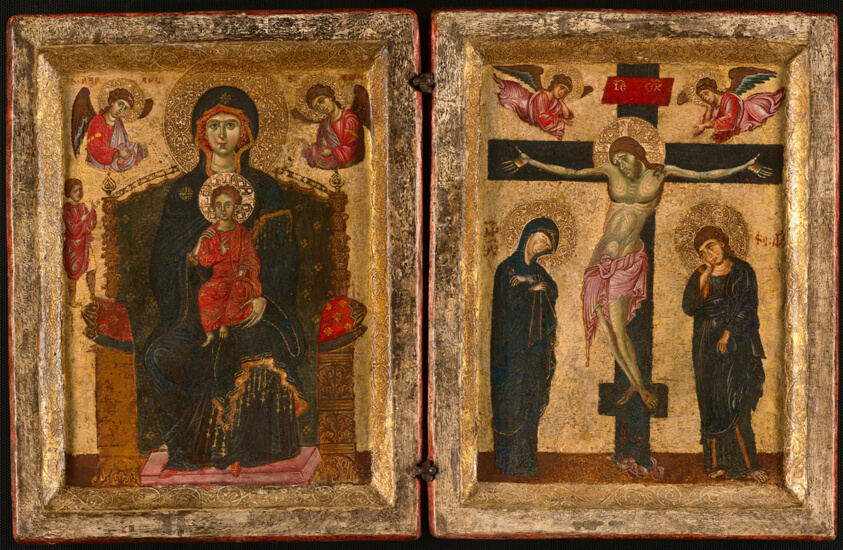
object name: Painting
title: Diptych of the Virgin and Child Enthroned and the Crucifixion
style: 13th century, medieval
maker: Eastern Mediterranean or Italian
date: c. 1280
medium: Tempera on panel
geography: Italy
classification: tempera; Italian; paint; painting; european painting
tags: Virgin and child/Madonna and child, inscription, angels, biblical, Christian subjects, Christianity, crucifixions, religion, religious, saints, Throne, Virgin Mary, Century of Progress, world's fairs, Chicago World's Fairs